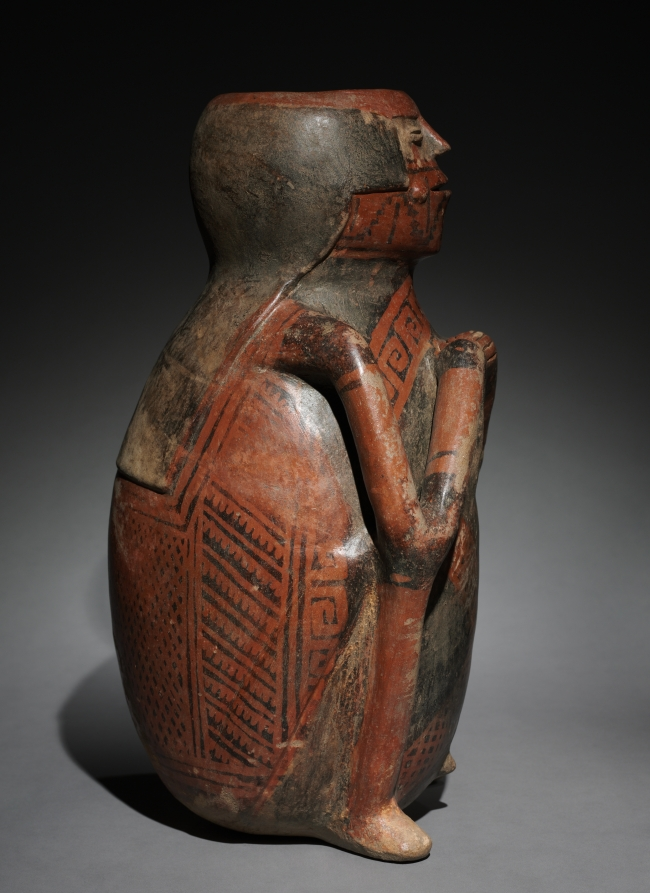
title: Anthropomorphic Vase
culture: Colombia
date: 500–1500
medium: earthenware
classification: Ceramic